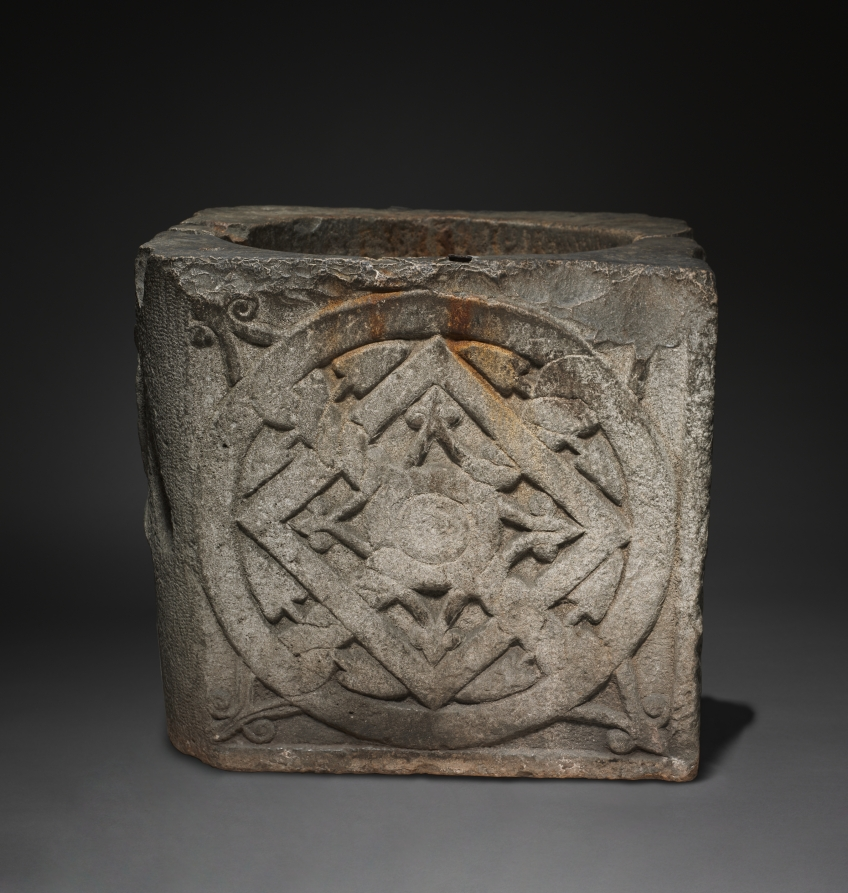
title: Well Head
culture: Lombardic, Italy, Venice(?), Migration period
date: 700s-800s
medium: limestone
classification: Sculpture